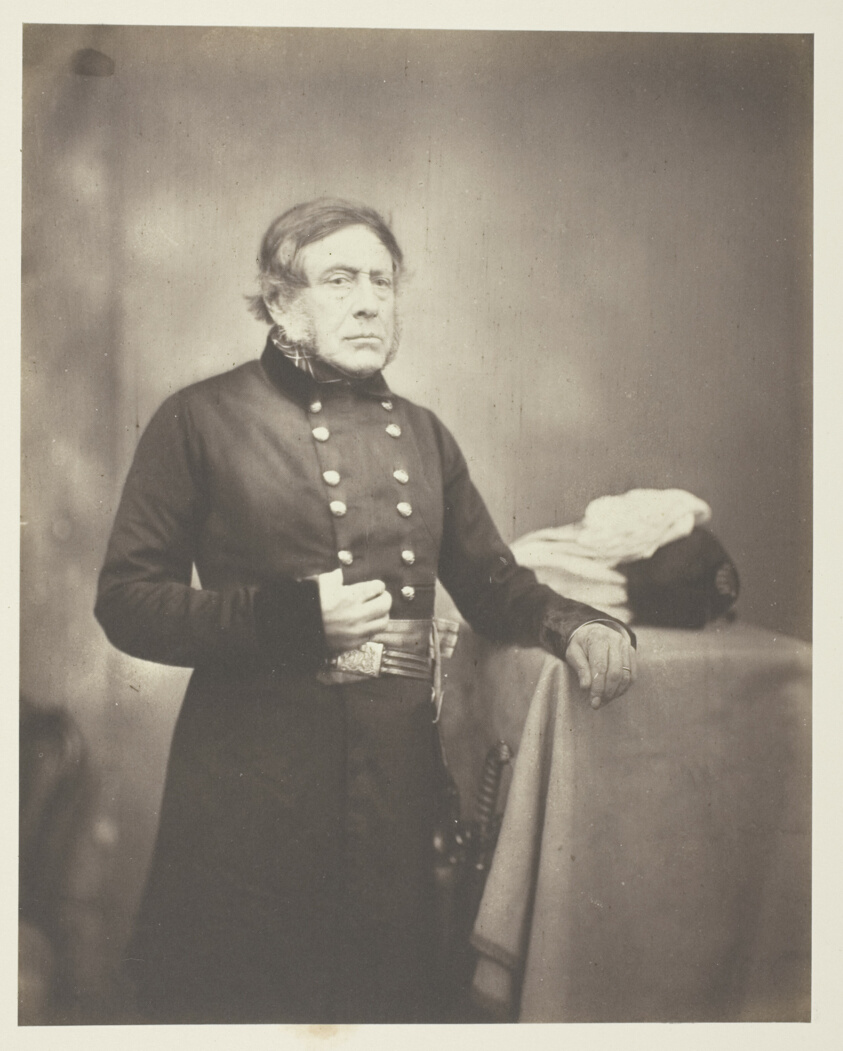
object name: Photograph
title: Lieutenant General Sir H.J.W. Bentinck, K.C.B.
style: 19th century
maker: Roger Fenton (English, 1819–1869)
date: 1855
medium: Salted paper print, plate 35 from the album "Photographs Taken in the Crimea" (1856)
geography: England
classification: salted paper print; photographic process; photography; photograph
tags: Collected by Hugh Edwards, Crimea 1856